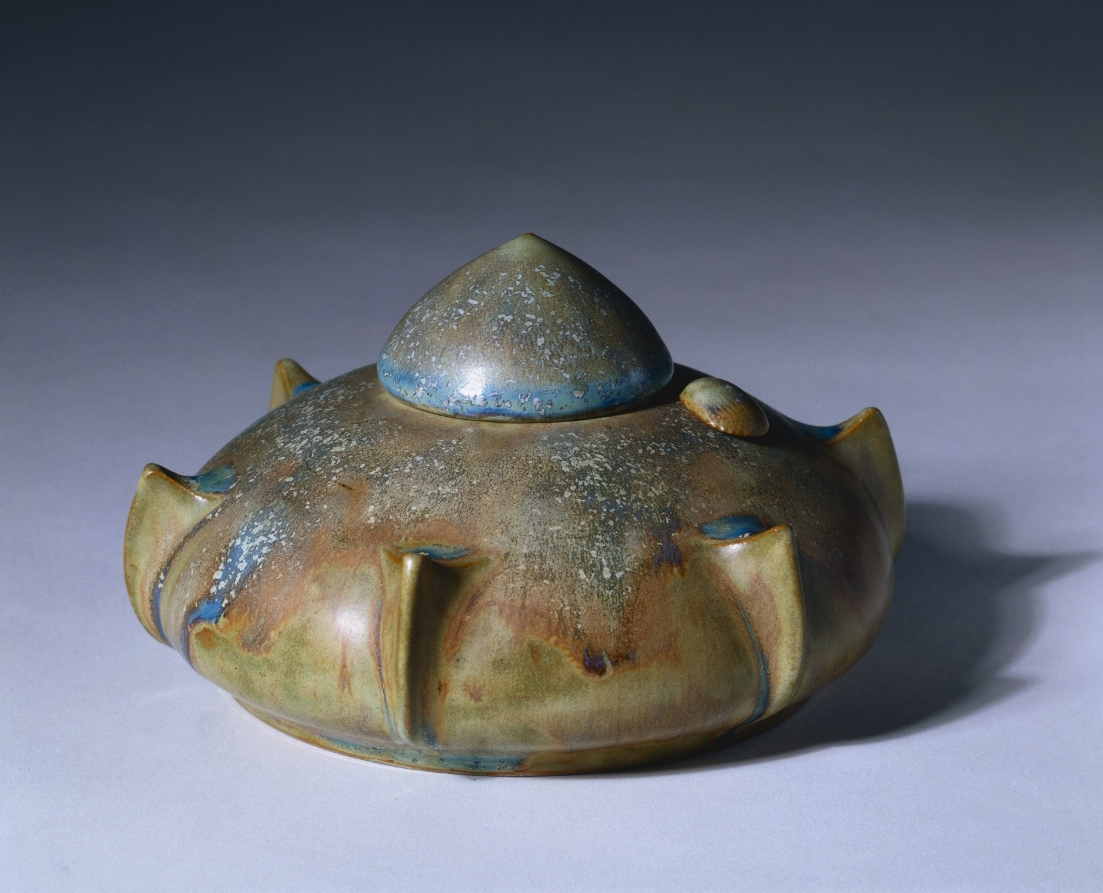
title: Inkwell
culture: France, Sèvres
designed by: Alexandre Sandier (French, 1843–1916)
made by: Sèvres Porcelain Factory (French, est. 1756)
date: 1903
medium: stoneware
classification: Ceramic